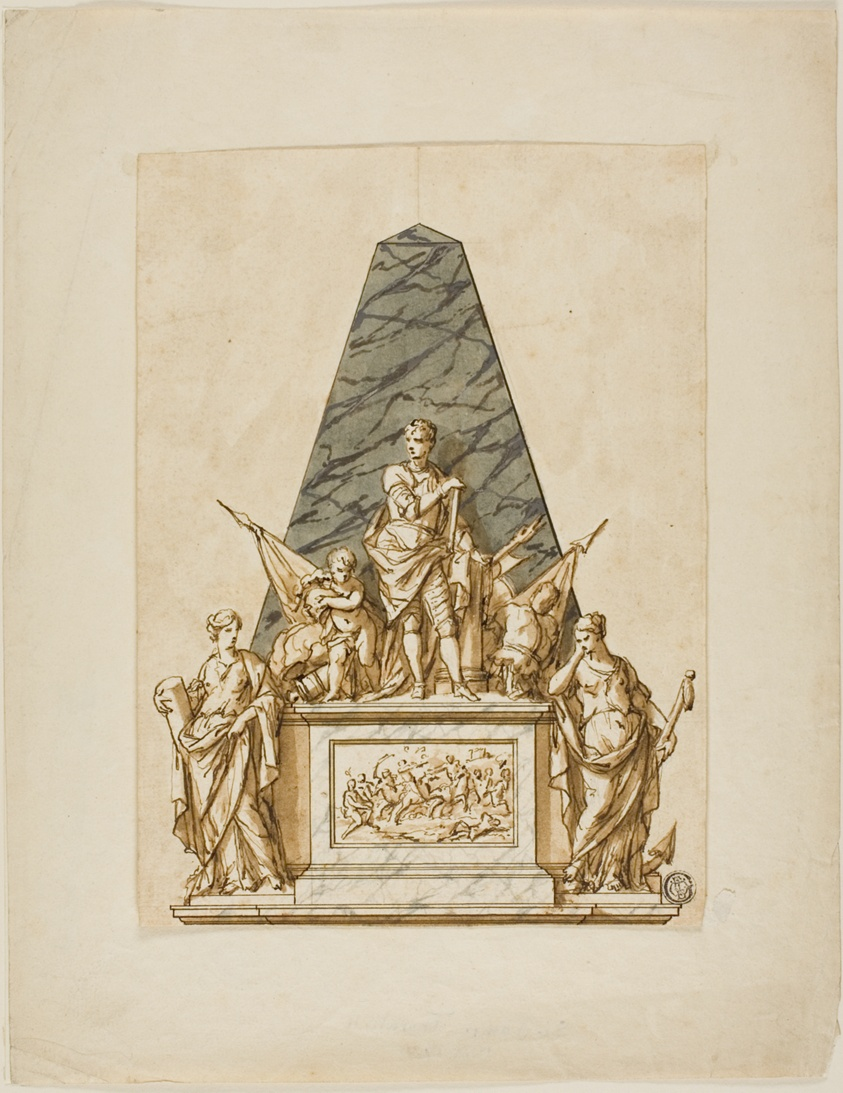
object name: Drawing and Watercolor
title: Unexecuted Design for the Monument to the First Duke of Marlborough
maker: John Michael Rysbrack (Flemish, 1693-1770)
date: c. 1733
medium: Pen and brown ink, with brush and gray and brown wash, over traces of graphite, on ivory laid paper, tipped onto cream wove paper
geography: Flanders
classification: pen and ink drawings; drawings (visual works); prints and drawing